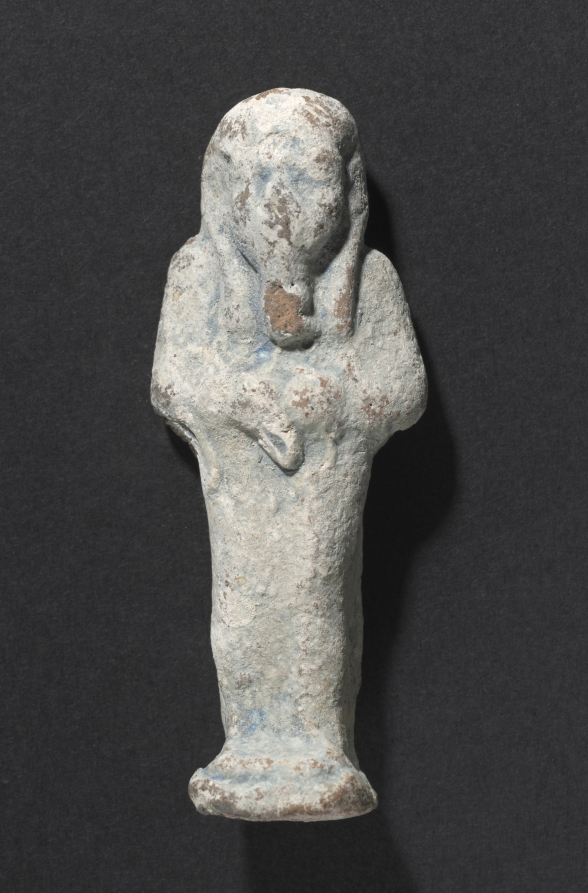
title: Shawabty of Ditamenpaankh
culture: Egypt, Late period (715–332 BCE), Dynasty 25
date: 715–656 BCE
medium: terracotta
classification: Funerary Equipment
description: High demand for shawabtys in the Late Period, a time when as many as 400 or more shawabtys were placed in the tomb with the deceased, gave rise to a specialized container for storing them: the shawabty box. This example is inscribed for the lady of the house, Ditamenpaankh, and was probably one of a pair originally made for her. The single-masted boat on the box's lid is perhaps an allusion to the pilgrimage of the deceased to the holy city of Abydos, the cult city of Osiris, king of the dead. The shawabtys inside are crude, mass-produced examples cast in an open mold. Made of terracotta, their blue paint imitates more costly shawabtys made of faience. As for the shawabty spell, it has been removed from its traditional location on the shawabty's front and relocated onto the sides of box, where it needed only to be written once, thus expediting production.